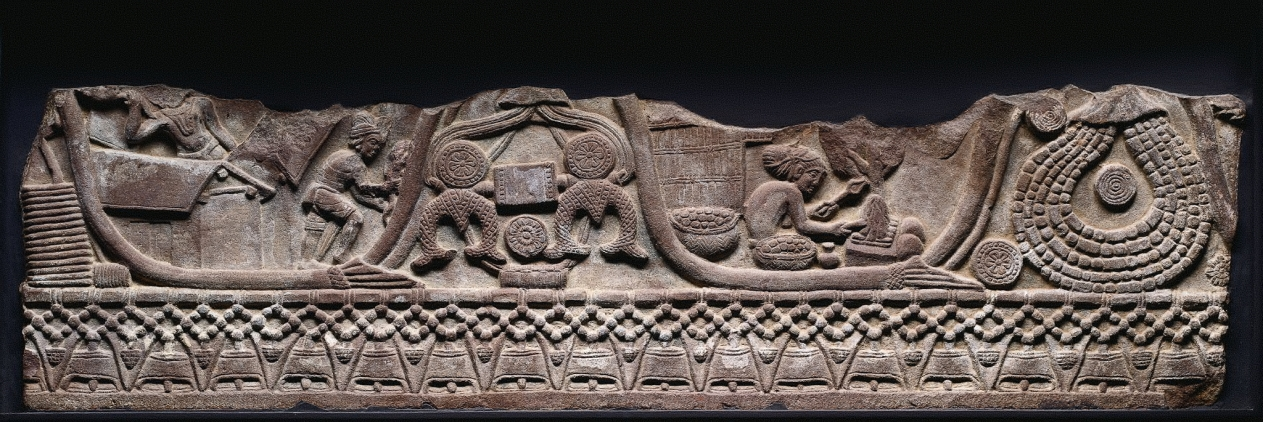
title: Section of a Coping Rail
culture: India, Madhya Pradesh, Bharhut, Shunga period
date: c. 150 BCE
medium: sandstone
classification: Sculpture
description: A coping rail is the top portion of a fence that connects the upright posts. Here, an undulating lotus rhizome blossoms with jewelry, and in the spaces between are scenes from two of the Buddha's past lives. At the left, a man catches and kills a lizard to eat it, and then lies about its running off (Godha Jataka); at the right an ascetic performs a Vedic fire sacrifice (possibly the Rajovada Jataka).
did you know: Known for having excellent vertical climbing abilities, the Indian monitor lizard (godha) is prized for its skin and meat.